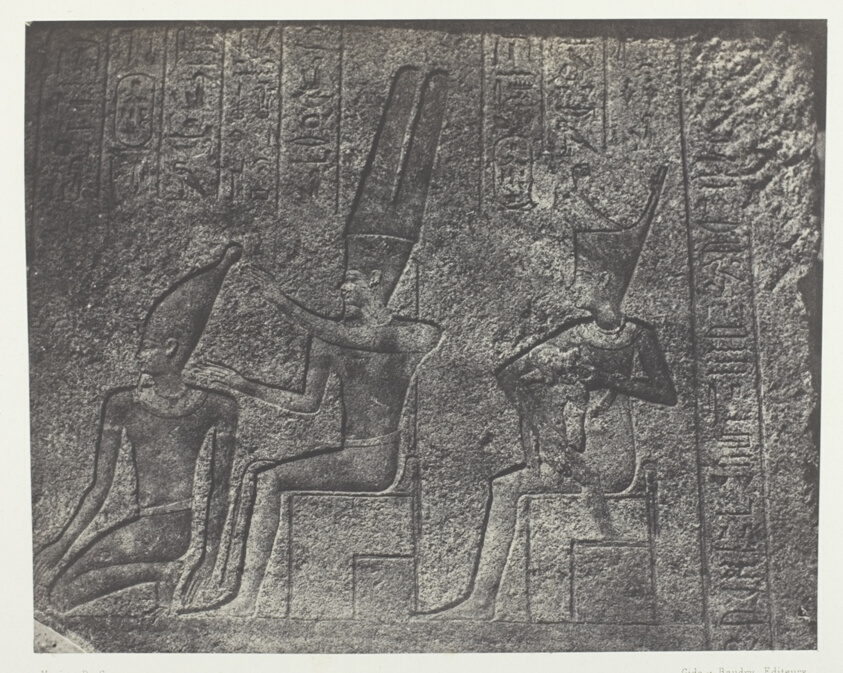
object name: Photograph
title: Palais de Karnak, Sculptures Extérieures du Sanctuaire de Granit; Thèbes, plate 40 from the album "Egypte, Nubie, Palestine et Syrie" (1852)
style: 19th century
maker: Maxime Du Camp (French, 1822–1894)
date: 1849/51, printed 1852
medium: Salted paper print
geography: France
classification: salted paper print; photographic process; photography; photograph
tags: Collected by Hugh Edwards, Egypte, Nubie, Palestine et Syrie